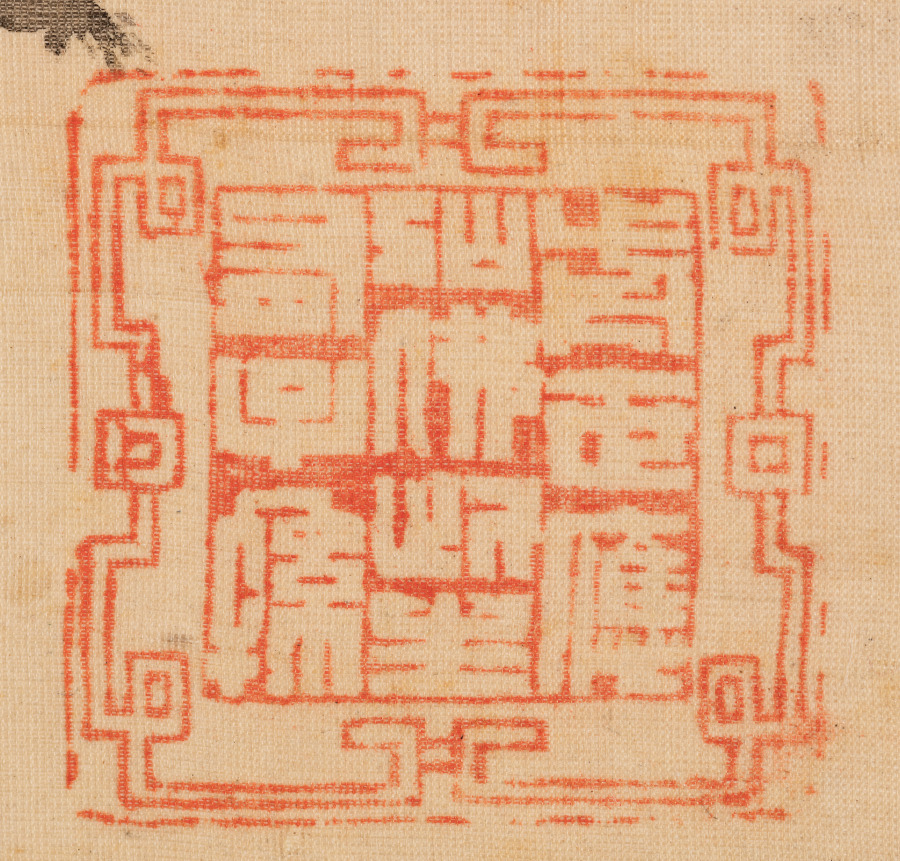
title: Orchids and Rocks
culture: Korea, Joseon dynasty (1392–1910)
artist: Yi Ha-eung (Korean, 1820–1898)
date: 1897–98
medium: Eight-panel folding screen; ink on silk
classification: Painting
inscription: Translation: [I] painted for the high minister Yangwon. [I] humbly request your corrections and advice [on my painting]. [By] an eighty-year old gentleman of rocks.)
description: Yi Ha-eung (1820−1898), the artist of this eight-panel folding screen, was one of the most influential men in late 19th-century Korea. Acting as the regent for his son, King Gojong (1852−1919), who ascended the throne at the age of thirteen, Yi ruled Korea from 1866 to 1873. In addition to his illustrious political career, Yi was also recognized as one of the most celebrated artists who led the revival of literati art in late 19th-century Korean art. In particular, he was recognized as the master of orchids, one of the “Four Gentlemen” (plum, orchid, chrysanthemum, and bamboo) themes. Solely relying on monochrome ink, Yi depicted the curvilinear silhouettes of cymbidium orchid leaves dramatically hanging down from cliffs. Growing in wilderness and redolent with fragrance, orchids were often associated with the perseverance of principled gentlemen, and thus became one of the most popular subjects of scholar-artists' paintings.On the upper right corner of the far left panel, Yi wrote a short inscription stating that he painted the work at the age of 80.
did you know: The artist of this elegant painting is the formidable politician Yi Ha-eung (1820–1898), who is known for a seclusion policy that aimed to protect Korea and its sovereignty from foreign influences.